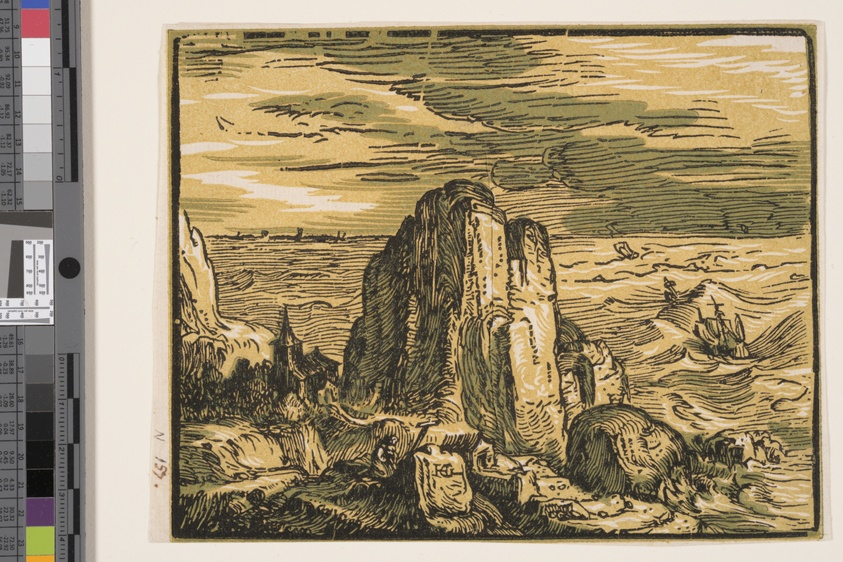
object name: Print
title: Cliff on a Seashore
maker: Hendrick Goltzius (Dutch, 1558–1617)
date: c. 1600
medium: Chiaroscuro woodcut from three blocks printed in green on ivory laid paper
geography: Netherlands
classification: woodcut; paper; print; prints and drawing